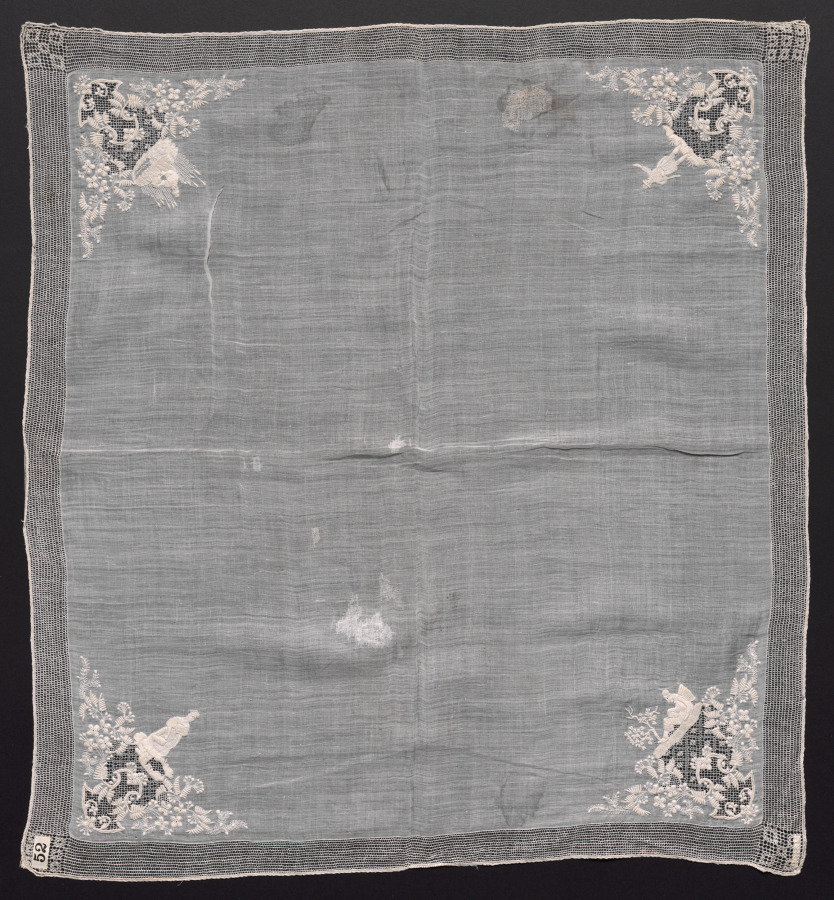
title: Embroidered Handkerchief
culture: Italy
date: 1700s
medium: Plain weave linen with needle lace (drawnwork) and embroidery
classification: Embroidery